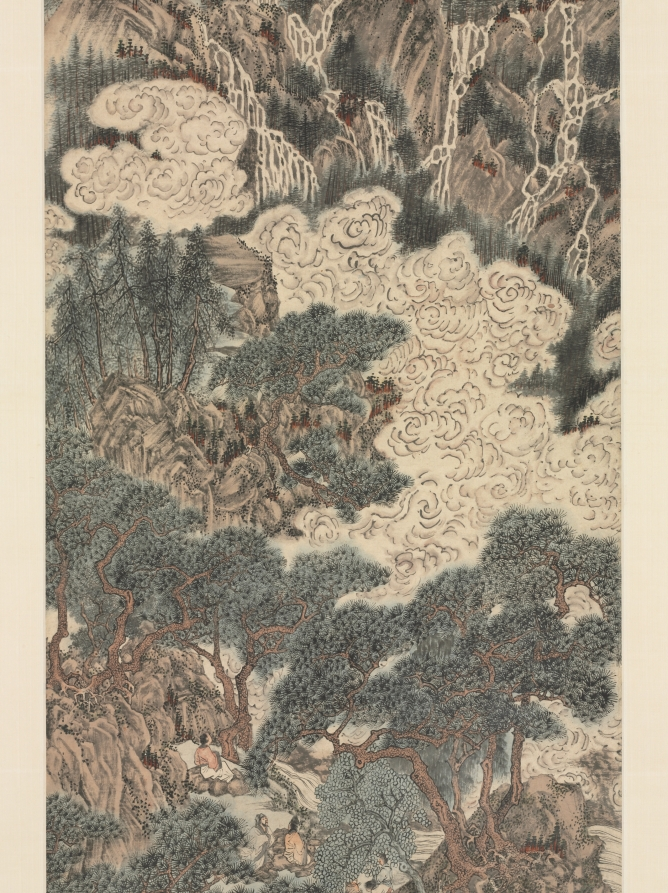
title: Morning Sun over Heavenly Citadel Peak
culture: China, Ming dynasty (1368–1644)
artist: Ding Yunpeng (Chinese, 1547-c. 1628)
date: 1614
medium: Hanging scroll; ink and light color on paper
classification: Painting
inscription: Artist's inscription, signature, and 2 seals: Clouds arise from the dale of the "Dark Plateau," The morning sun is over the peak of the Heavenly Citadel. In mid-spring of the chia-yen year of the Wan-li era [1614], painted as a fiftieth birthday present to Mr. Chung-lu. Junior Friend of Family Alliance, Ting Yün-p'eng [seals] Yün-p'eng chih yin; Ting Nan-yü.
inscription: 10 additional seals: 5 of Kao Hsiang-ling (dates unknown); 5 unidentified.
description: A birthday gift, this scroll by Ding Yunpeng from Anhui is among the earliest paintings of Mount Huang (Yellow Mountains), here depicting Heavenly Citadel Peak. The mountains are named after the legendary Yellow emperor who is said to have visited the place to look for the essence of immortality. Deep red strokes accentuate vegetation and allude to cinnabar, the alleged elixir of immortality. Difficult to climb and access, Mount Huang in Anhui province did not become a destination for hikers nor a subject for artists before the late Ming dynasty, when steps were built. Today its towering peaks are a national site and tourist attraction.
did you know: Mount Huang, known for its scenic beauty, is one of China's major tourist attractions.